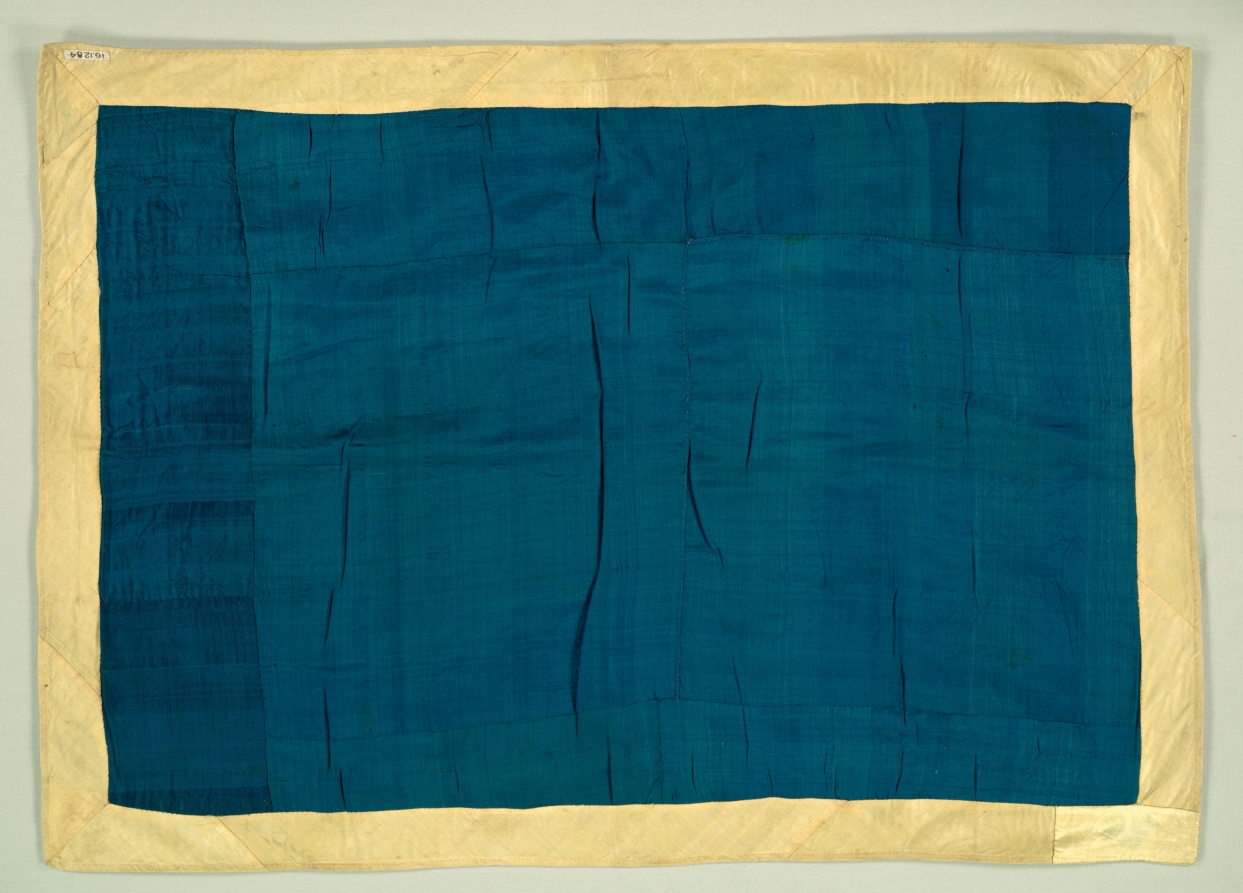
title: Cover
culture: Turkey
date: 1500s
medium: compound weave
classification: Textile